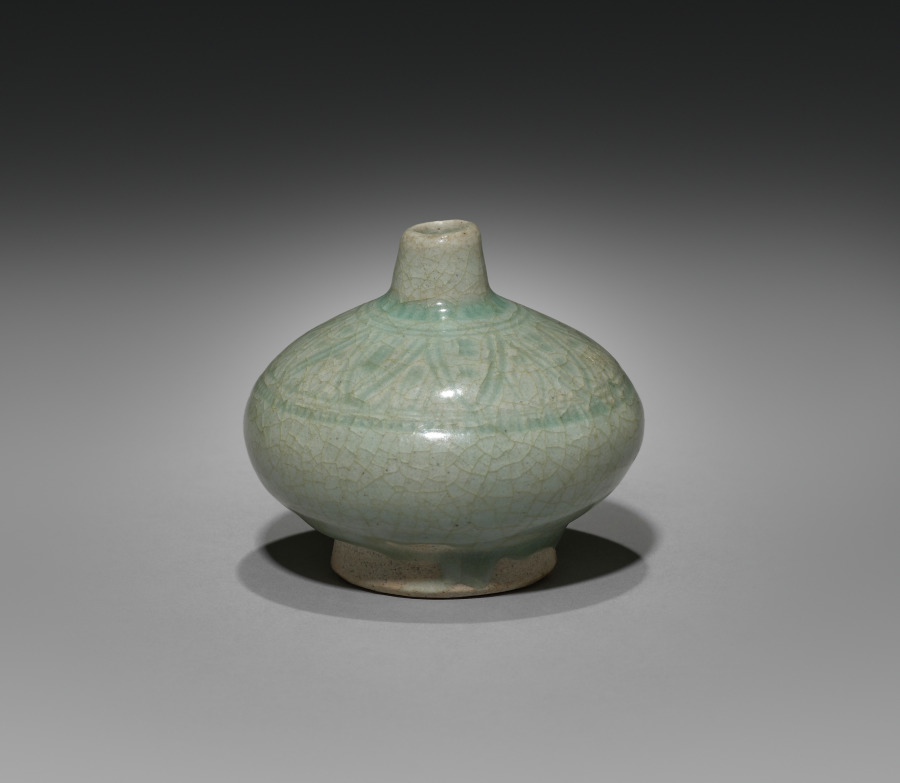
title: Small Jar: Sawankhalok Ware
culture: Thailand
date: 1300s–1400s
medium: porcelain with celadon glaze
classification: Ceramic